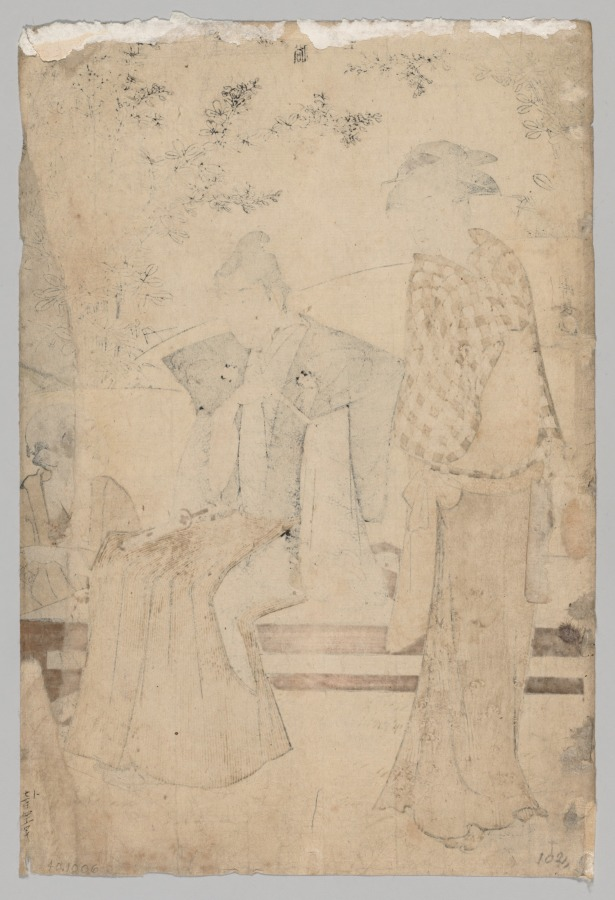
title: Two Lovers (from the series Brocades of the East in Fashion)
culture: Japan, Edo period (1615–1868)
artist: Torii Kiyonaga (Japanese, 1752–1815)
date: 1752–1815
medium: color woodblock print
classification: Print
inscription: Signature: Kiyonaga gwa